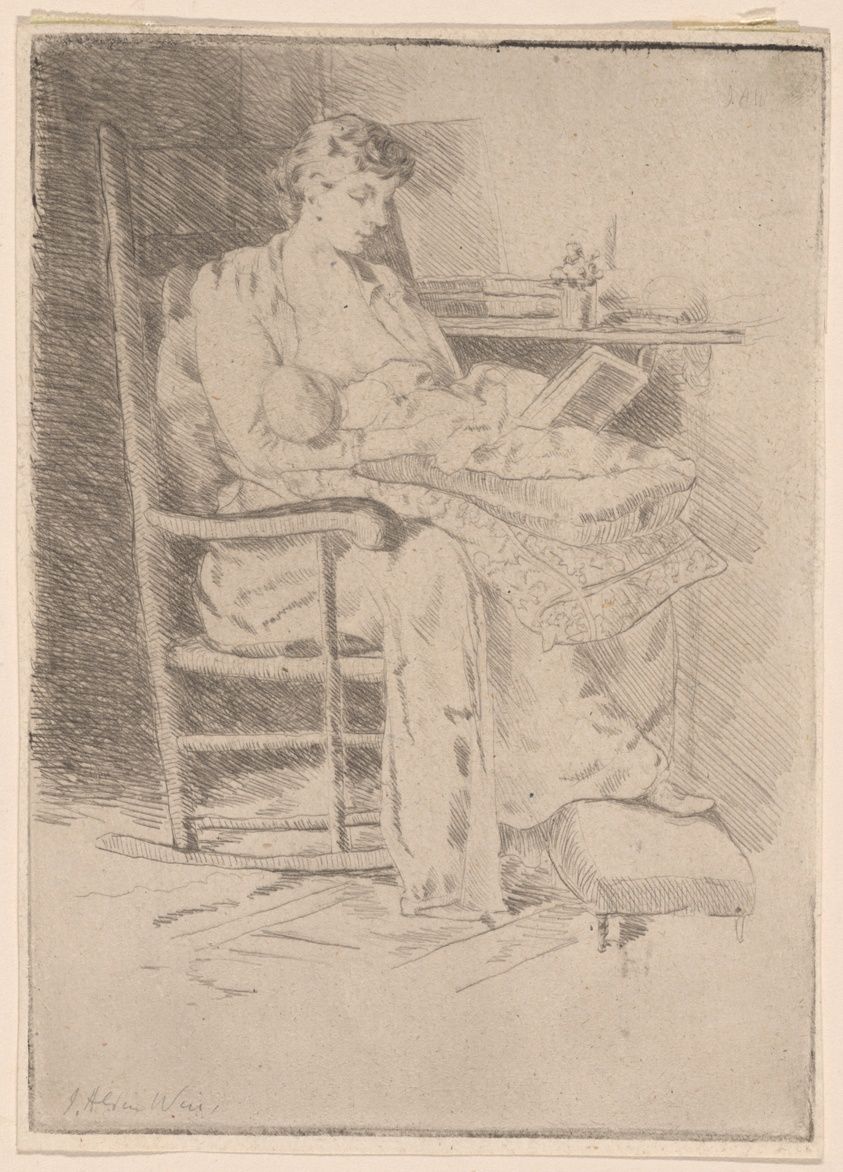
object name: Print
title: Mother and Child, No. 2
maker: Julian Alden Weir (American, 1852-1919)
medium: Etching in black on cream laid paper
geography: United States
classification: prints and drawing; paper; print; etching